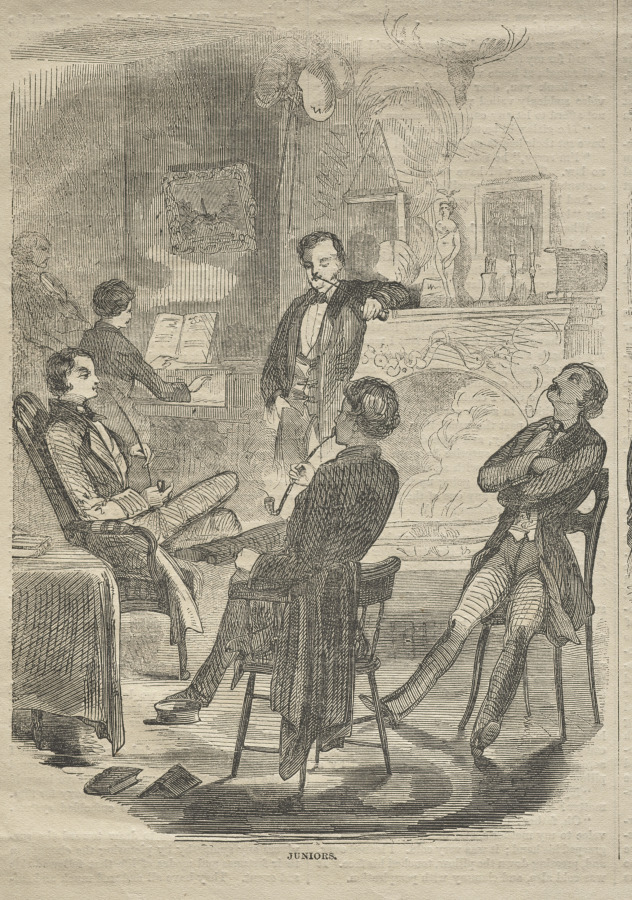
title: Juniors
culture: America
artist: Winslow Homer (American, 1836–1910)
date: 1857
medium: wood engraving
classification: Print